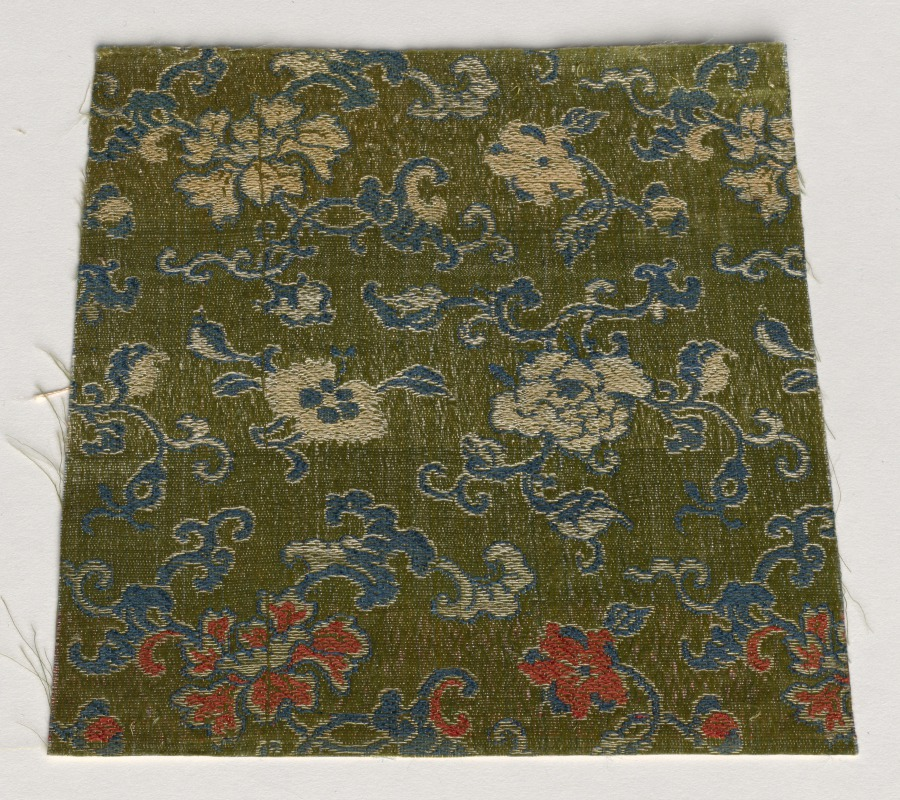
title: Fragment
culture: China, 19th century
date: 1800s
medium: satin ground; silk diasper weave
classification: Textile